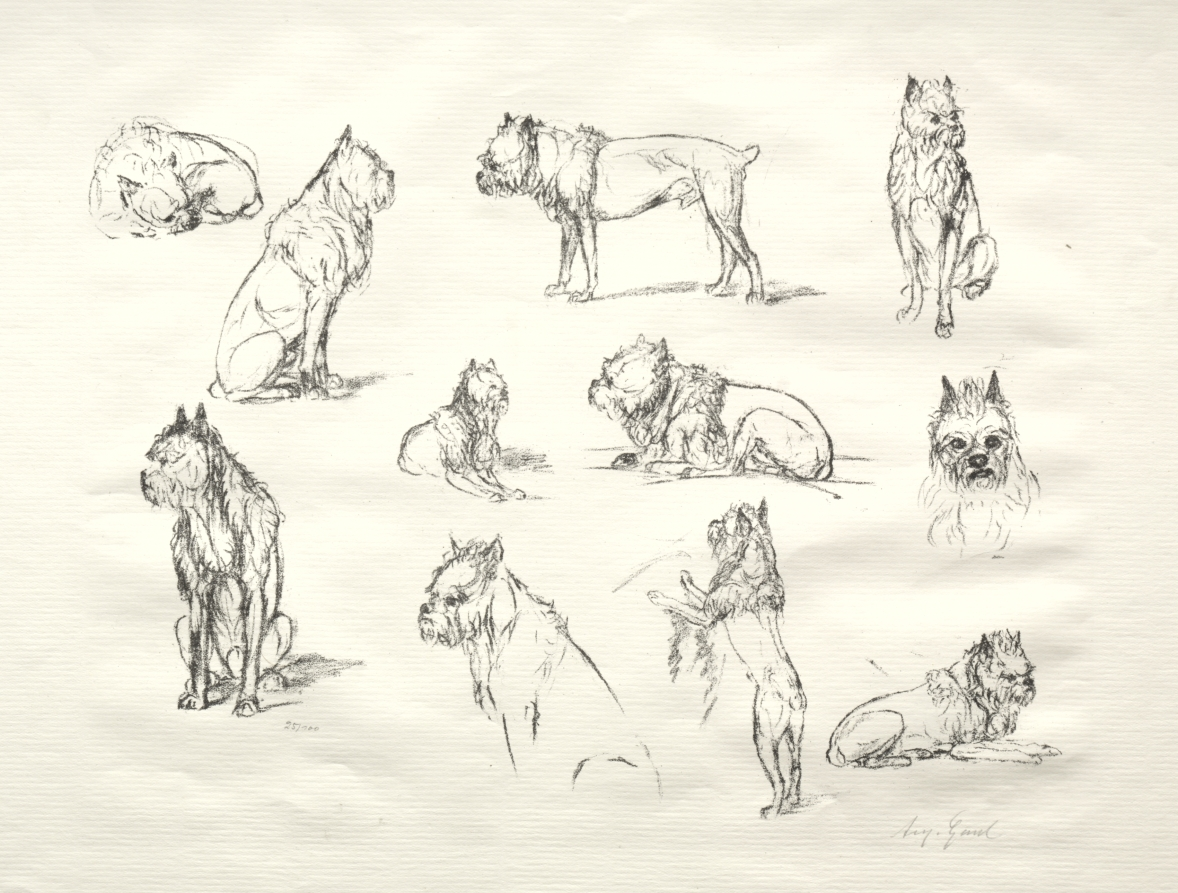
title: Study of Dogs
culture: Germany, 20th century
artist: August Gaul (German, 1869–1921)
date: c. 1889–1921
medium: lithograph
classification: Print